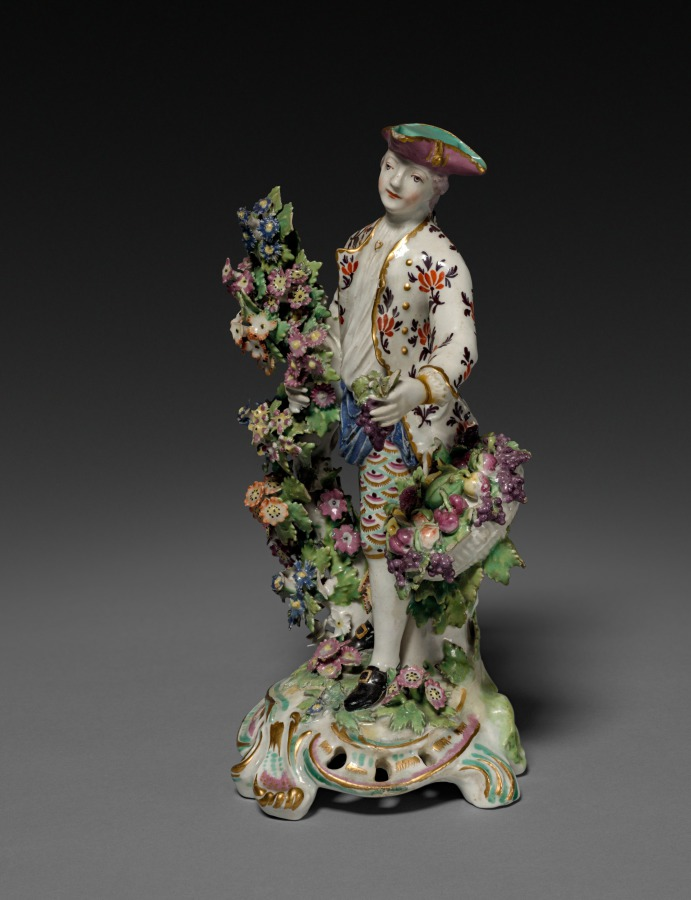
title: Figure of a Gardener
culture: England, London, Bow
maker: Bow Porcelain Factory (British)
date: c. 1765–70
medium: soft-paste porcelain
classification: Ceramic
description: Even though this figure and his counterpart (1945.36) are not accompanied by a sheep, these ceramic sculptures were sometimes known as “Garland Shepherds” during the mid-1700s. The name derived from a similar set produced by one of the Bow Porcelain Factory’s rivals, the Derby Porcelain Factory, in which the male figure holds a lamb. While these two factories often produced similar sets of pastoral, allegorical, biographical, and religious figures, the Bow Factory was known as one of the preeminent porcelain manufacturers, rivaled only by the Chelsea Porcelain Factory, with which Bow would later merge.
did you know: Due to the abundance of grapes, pears, plums, and other fall fruits spilling from the figure’s basket, this Gardener has also been considered a personification of Autumn.